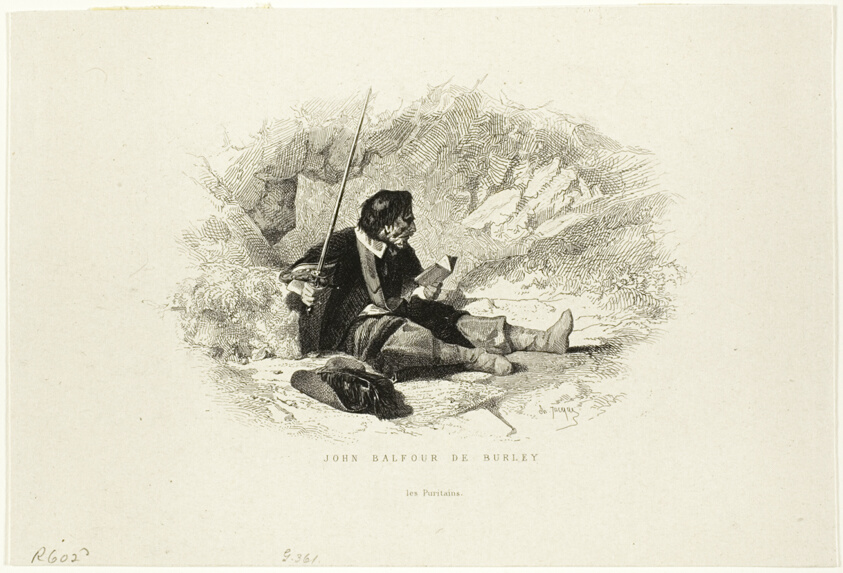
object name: Print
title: John Balfour de Burley - Les Puritains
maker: Charles Émile Jacque (French, 1813-1894)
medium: Etching and engraving on ivory wove paper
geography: France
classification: etching; print; prints and drawing